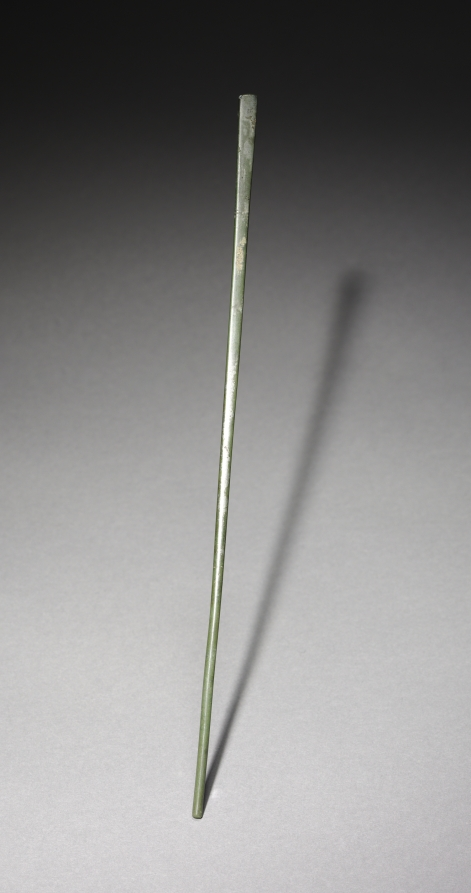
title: Chopstick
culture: Korea, Goryeo dynasty (918–1392)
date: 918–1392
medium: bronze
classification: Metalwork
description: In Korea, chopsticks made of metal such as brass, silver, and gold were excavated from ancient tombs and ruins dated to the 6th century at the earliest. Burial goods often include utilitarian objects such as table wares and utensils because the dead were believed to need them in the afterlife.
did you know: In contrast to the Chinese and Japanese, Koreans still prefer metal chopsticks (stainless steel and brass) to wooden ones.